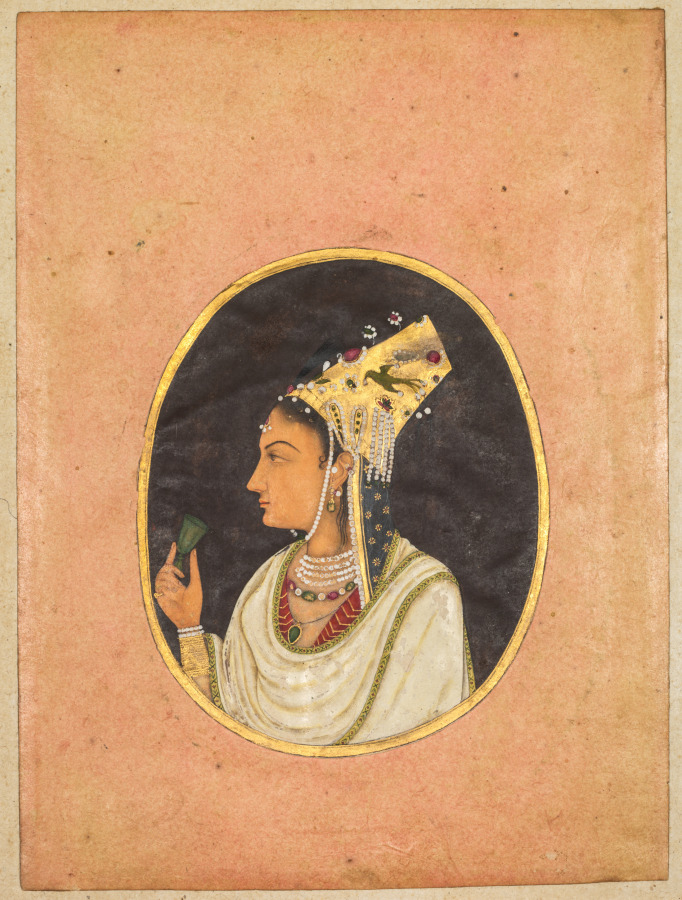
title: Oval portrait of a woman in a Chaghtai hat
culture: India, Mughal, 18th century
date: c. 1740–50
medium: Gum tempera and gold on paper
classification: Painting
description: The tall, flat-topped hat is an element of the native dress of the Mughals from eastern Uzbekistan. Of mixed Turkic and Mongol ethnicities, they spoke a Turkic language known as Chaghatai. Chaghatai refers to the name of the son of the Mongol Chingiz (Genghis) Khan, who ruled this area of Central Asia from 1246 to 1282. This woman’s hat has been studded with jewels and strings of pearls. The portrait jewel format that was once reserved for the emperor has now been expanded to include ladies of the court. The woman holds a jade wine cup and wears a draped upper garment with a woven or embroidered border similar to the fragment on display at the left.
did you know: She holds a delicate jade cup of the type for which the Mughals were famous.